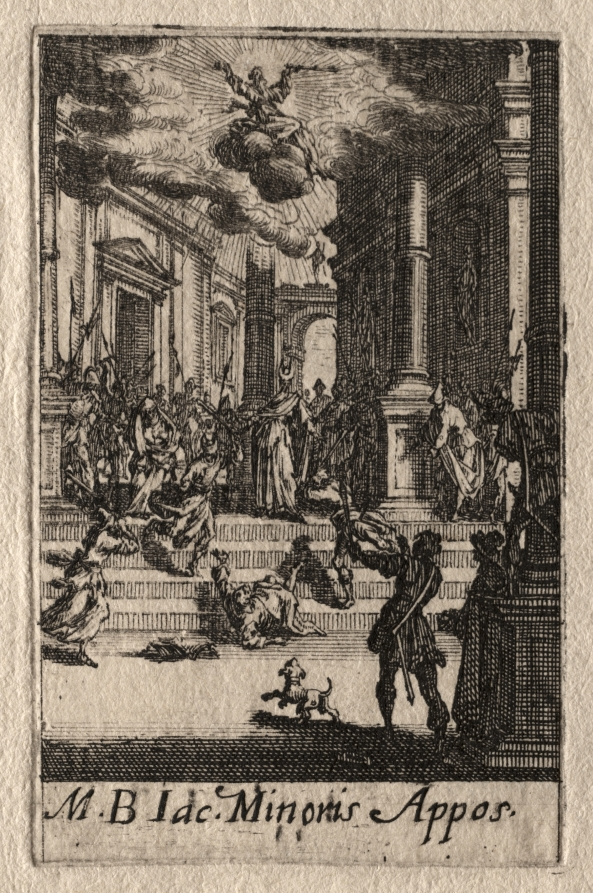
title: The Martyrdom of the Apostles: St. James the Less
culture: France, 17th century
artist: Jacques Callot (French, 1592–1635)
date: ca. 1632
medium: etching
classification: Print